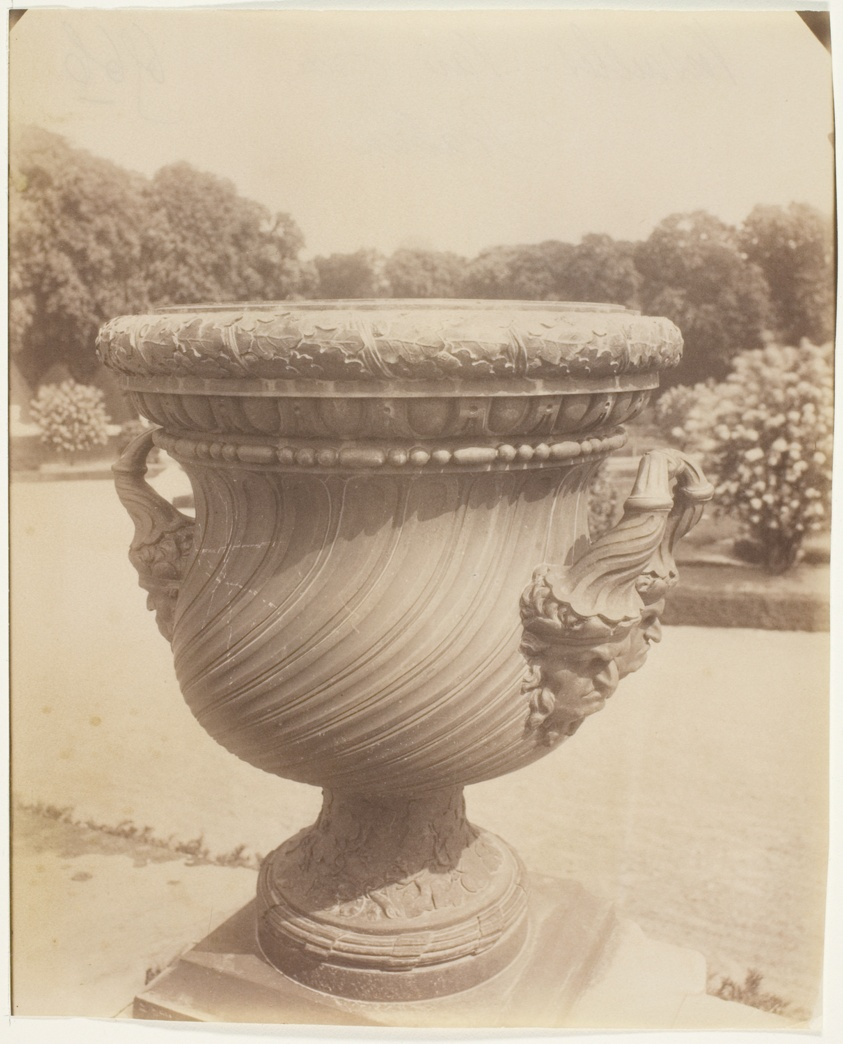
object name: Photograph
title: Versailles, Vase par Ballin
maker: Jean-Eugène-Auguste Atget (French, 1857–1927)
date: 1905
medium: Albumen print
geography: France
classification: albumen silver print; photographic process; photography; photograph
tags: Collected by Hugh Edwards